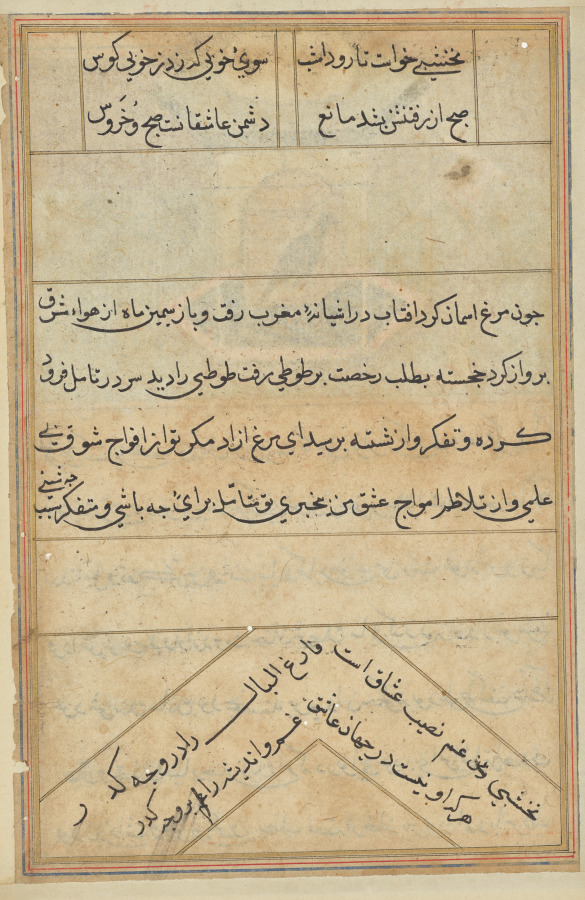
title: Page from Tales of a Parrot (Tuti-nama): text page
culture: Mughal India, court of Akbar (reigned 1556–1605)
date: c. 1560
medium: gum tempera, ink, and gold on paper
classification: Painting